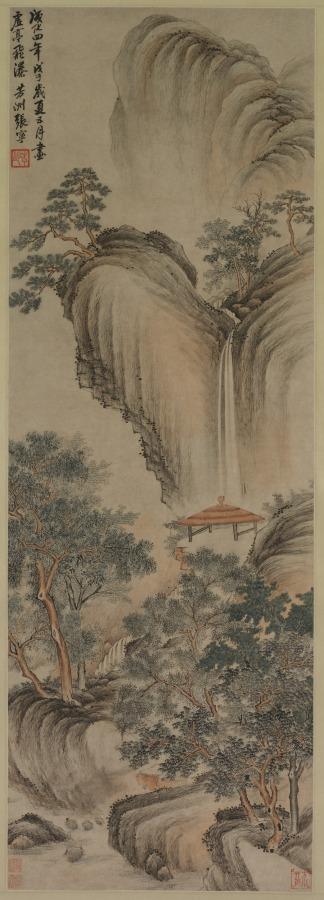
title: Empty Arbor and Rapid Waterfall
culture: China, Ming dynasty (1368–1644)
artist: Zhang Ning (Chinese, 1426-c. 1495)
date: 1468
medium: hanging scroll, ink and color on paper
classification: Painting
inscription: Artist's inscription, signature, and 2 seals: Painted in the summer, the fifth month of the wu-tzu year, the fourth year of the Ch'eng-hua era [1468]. Empty Arbor and Rapid Waterfall. Fang-chou, Chang Ning [seals] Ching-chih; Fang-chou ts'ao-t'ang. 2 additional seals: 1 of Ch'eng Ch'i; 1 unidentified.